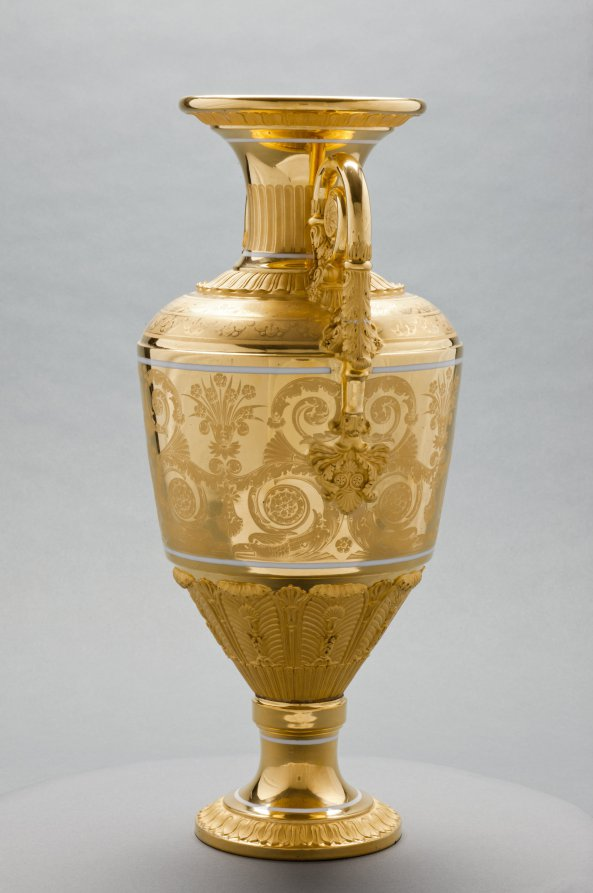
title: Vase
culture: Russia, St. Petersburg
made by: St. Petersburg Imperial Porcelain Factory (Russian)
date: c. 1820–1830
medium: gilt porcelain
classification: Ceramic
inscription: inscribed: "Moreau" in gold near lip.